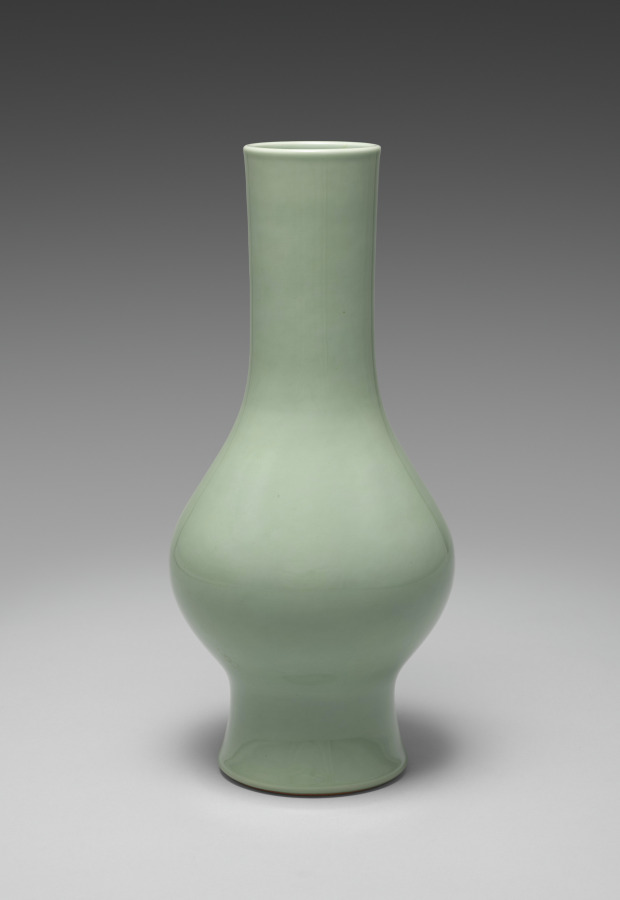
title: Flower Vase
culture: Japan, Meiji period (1868–1912)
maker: Seifū Yohei III (Japanese, 1851–1914)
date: 1912–14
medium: Porecelain with green glaze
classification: Ceramic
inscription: The vase's box lid identifies the vase as hisokuyō (C. mise yao 秘色窯), or “mysterious color ware,” style.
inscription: 清風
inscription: 清風制之 【印】帝室技芸員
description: This flower vase has a tall, slightly flared foot and bulbous body with a slimmer neck. It is completely undecorated but for the hisoku, or “mysterious color,” glaze. Its box lid has a red seal with a flower on it, a rather unusual feature also seen on the box for the green-glazed water container that belonged to the Hosokawa family (see CMA 2022.197).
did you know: The vase's box lid identifies the glaze as hisoku 秘色 or “mysterious color.”